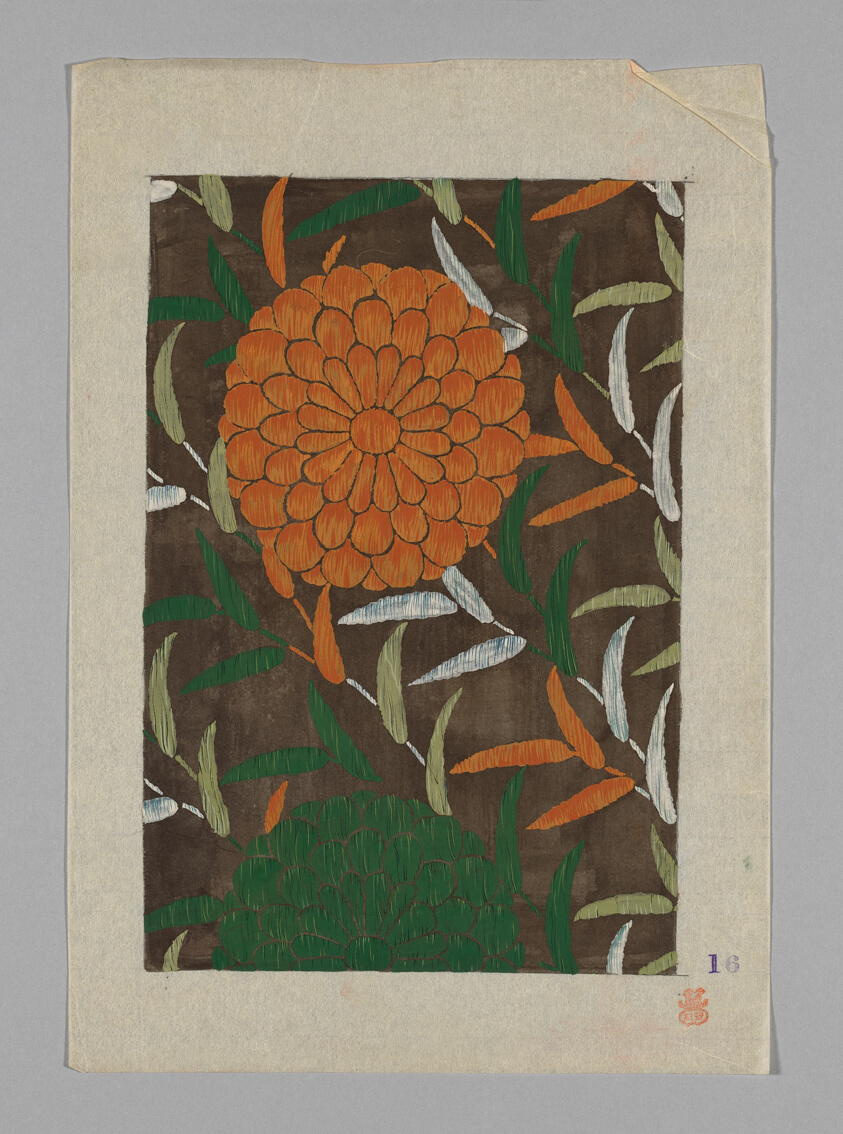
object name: Drawing and Watercolor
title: Design on Paper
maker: Japan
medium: Paper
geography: Japan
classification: textile; accessory - paper design; watercolor; paper